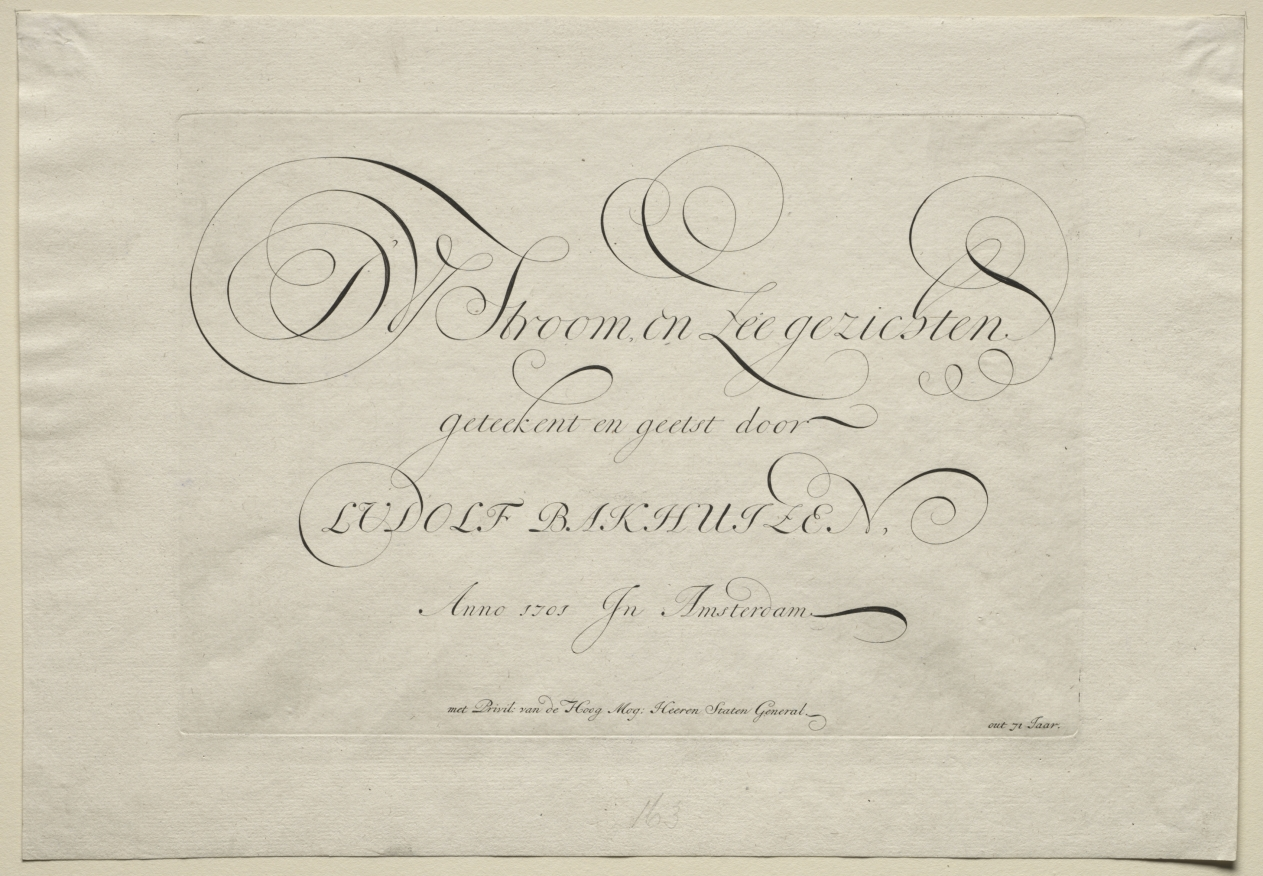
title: The River IJ and Seascapes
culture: Netherlands, early 18th century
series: The River IJ and Seascapes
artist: Ludolf Backhuysen (Dutch, 1631–1708)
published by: Ludolf Backhuysen (Dutch, 1631–1708)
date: 1701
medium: set of 10 prints plus title page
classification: Portfolio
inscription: from title page, in plate: Stroomen Zeegezichten / geteekent en geest door / LUDOLF BAKHUYZEN, / Anno 1701 In Amsterdam / met Privil: van de Hoog Mog: Heeren Staten General. / out 17 Jaar. ; lower center, in graphite: 163 ; VERSO, lower left, in graphite: on[i?]on. p / Durronts Sale / No 163 1847